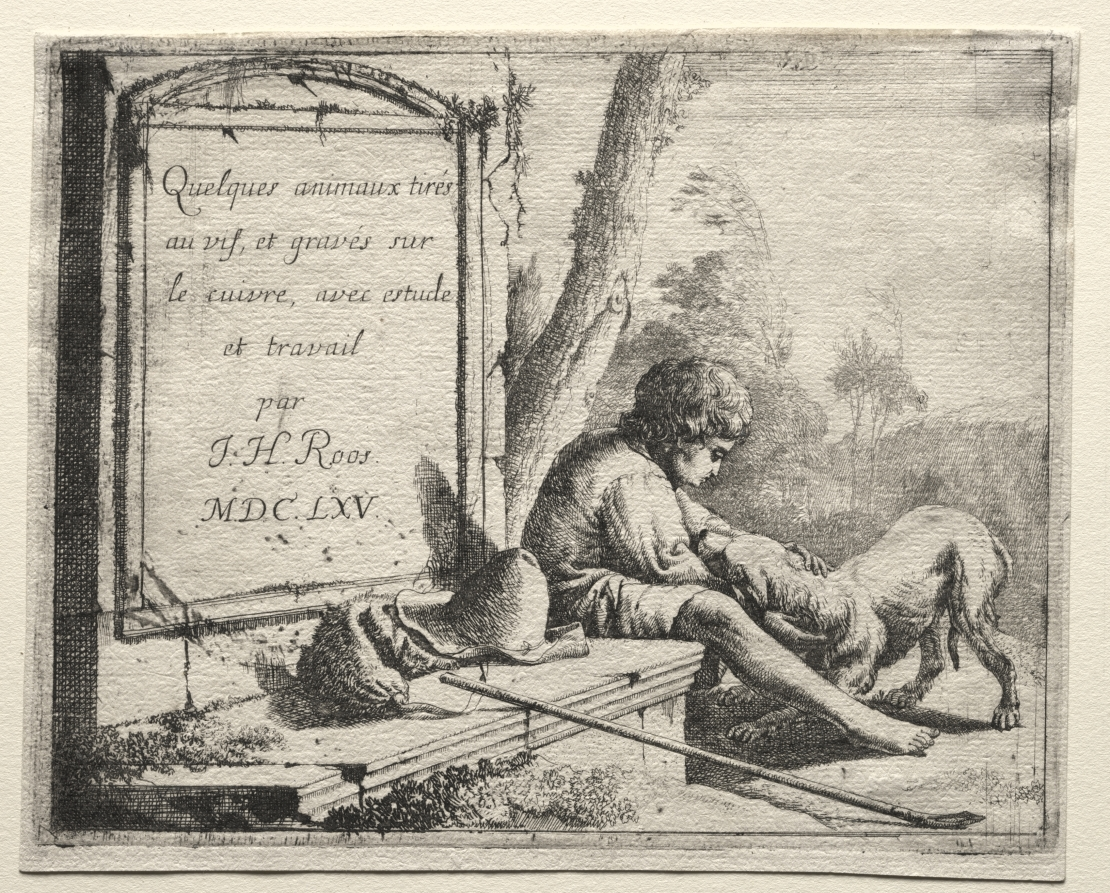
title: Title Page: Shepherd Petting his Dog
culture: Germany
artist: Johann Heinrich Roos (German, 1631–1685)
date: 1665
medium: etching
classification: Print